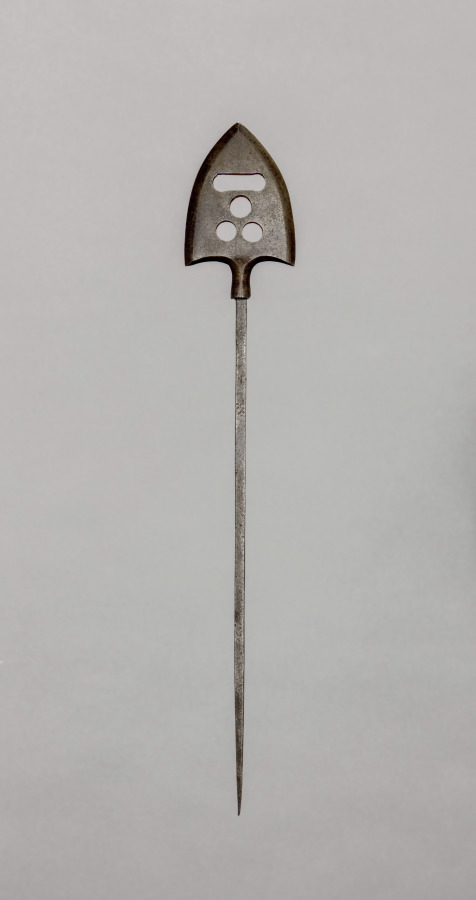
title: Arrow Head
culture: Japan, Edo period (1615–1868)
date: 1600s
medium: iron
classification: Arms and Armor